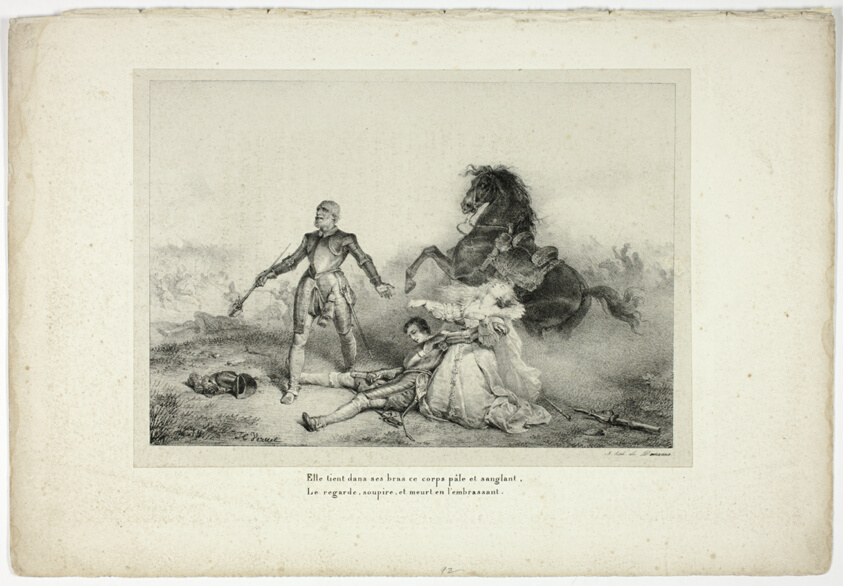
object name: Print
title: She Held in Her Arms the Corpse Pale and Bloody...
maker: Horace Vernet (French, 1789-1863); poem by Voltaire (French, 1694-1778); printed by Demanne (French, 18th-19th century); published by Dubois (French, 18th-19th century)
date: 1825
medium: Lithograph in black on gray chine, laid down on ivory wove paper (chine collé)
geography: France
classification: lithograph; print; prints and drawing